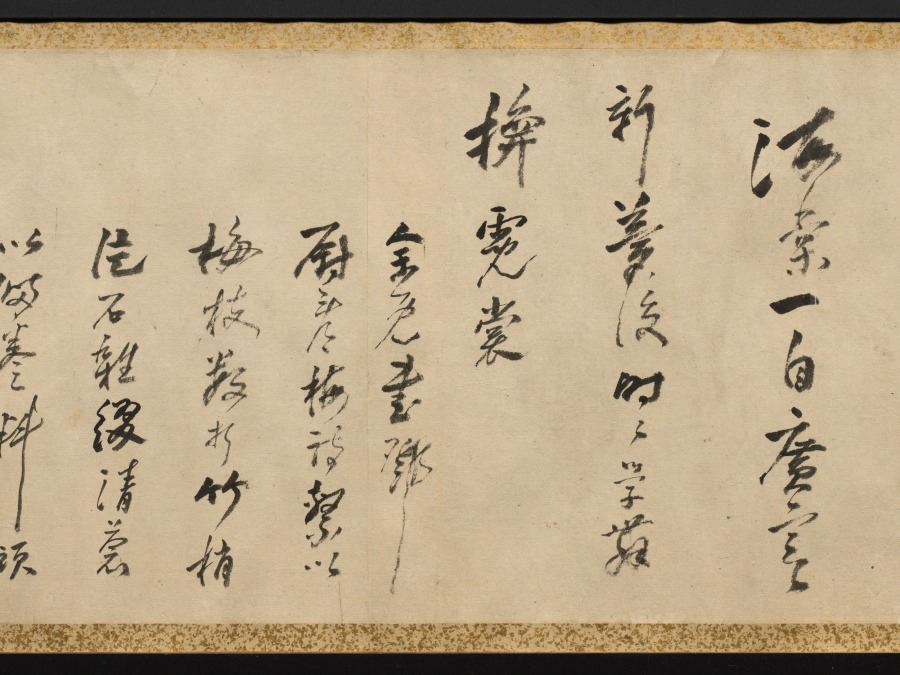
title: Plum Blossoms and Peonies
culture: China, Qing dynasty (1644-1911)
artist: Gao Fenghan (Chinese, 1683–1749)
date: 1741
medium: handscroll, ink on paper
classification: Painting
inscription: Artist's 2 inscriptions and 9 seals (the painting of Peonies with the artist's colophon and the colophon by Hou Chia-fan are on a single sheet of paper). Artist's inscription and 2 seals (Plum Blossoms): [seal] Ts'ai-yün. After finishing writing my colophon, I unrolled the painting to take another look, and it now seems that the composition here should have moved to the later part of the scroll. If that is the case, then the "Cool Beauty" [prunus] of the Solitary Hill is after all unable to take precedence over the "King of Flowers" [peony]. A laugh. Lao-fou inscribed. [seal] Feng-han. Artist's colophon (Plum Blossoms): [3 seals] Tun; Yen-yün-kung-yang, Hou-shang-tso-sheng. A few days after I painted this scroll for Shui- hsien [Yüeh Meng-yüan], the plum blossoms were in full bloom at his residence. He invited me over to enjoy them together for a long while, and I composed two additional poems and wrote them down here for his criticism. [Poems on the colophon are not translated.] First month, twenty-first day, your junior, Kao Feng-han of Nan-fou drafted this with the left hand. [seal] Feng-han. Artist's inscription and 4 seals (Peonies): Brushed with the left hand in the hsin-yu year [1741]. [seal] Yu-hsi. [3 seals at end of painting] Hou-shang-tso-sheng; Yen-yün-kung-yang; Shih-tsao-wu. Artist's colophon and seal (Peonies): The imperial concubine from the Yang family loved to dress in red, And from the emperor won the title of Hai-t'ang. But ever since she became the new dream of the moon palace, She changed into rainbow colors, while learning to dance. After I wrote the poem on Looking for Plum Blossoms in the Teng-wei Mountains, I attached to it a few branches of prunus, some bamboo tips and a piece of rock, with a scattering of green [moss] here and there to fill up the scroll. Unexpectedly, my playful fascination [with these subjects] was still not quite satisfied, so I made up these amorous ideas and romantic images [of the peony], to follow the footsteps of the fair lady of the Ku-hsieh Mountain [prunus]. Furthermore, I picked out one poem to be my vanguard. Perhaps such luminosity of wealth and power will be enough to overwhelm the poor fellows, and [they] will not mind the comparatively short length [of paper] assigned to it. Amusingly inscribed. Please correct me again. To Shui-hsien, my learned senior, your junior Han inscribed again. [seal] Tso-hua [left-handed painting]. 1 additional colophon and 5 additional seals: 1 colophon, dated 1742, and 3 seals of Hou Chia-fan (act. ca. 1742); 1 seal of P'u Ch'üan (20th c.?); 1 seal of Li family (dates unknown).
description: One of the so-called Yangzhou Eccentrics (a group of painters who lived in Yangzhou and were known for their unorthodox art and lifestyle), Gao Fenghan depicts China’s two most loved flowers in full bloom—the “cold beauty,” or plum blossom, in the first section, and the “king of flowers,” or peony, in the second section. Painted in 1741, the year when Gao decided to leave the south and return home to Shandong province in eastern China, this work was likely a token of farewell. His casual brushwork may indicate his mental and physical struggle at the time. After having crippled his right hand in 1737, Gao used his left hand to paint and achieved a crudeness and eccentric style unattainable before.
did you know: In East Asian art, peonies traditionally symbolize prosperity and wealth.